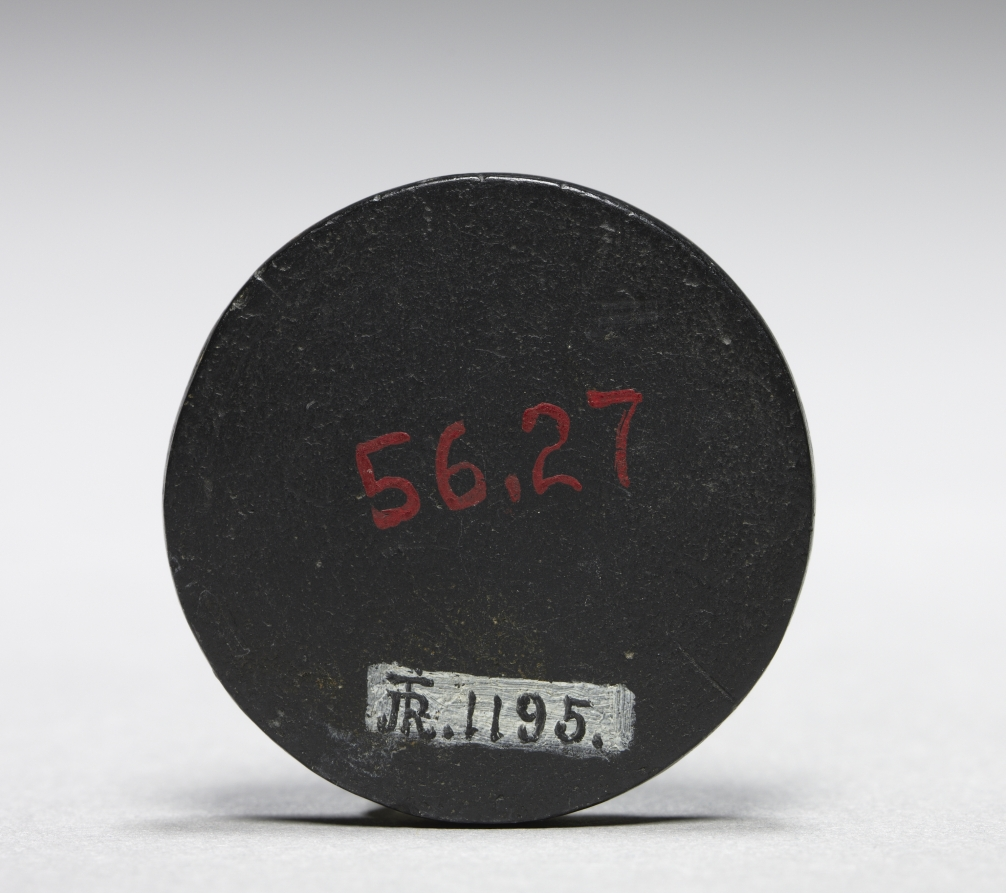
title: Model for the Reverse of the Portrait of Pankraz Labenwolf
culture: Germany, Nuremberg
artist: Ludwig Neufahrer (German, c. 1500–1563)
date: 1542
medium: Kelheim stone (fine-grained limestone)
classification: Sculpture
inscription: inscription: "DI ZEIT GIBCZ" (Time provides).